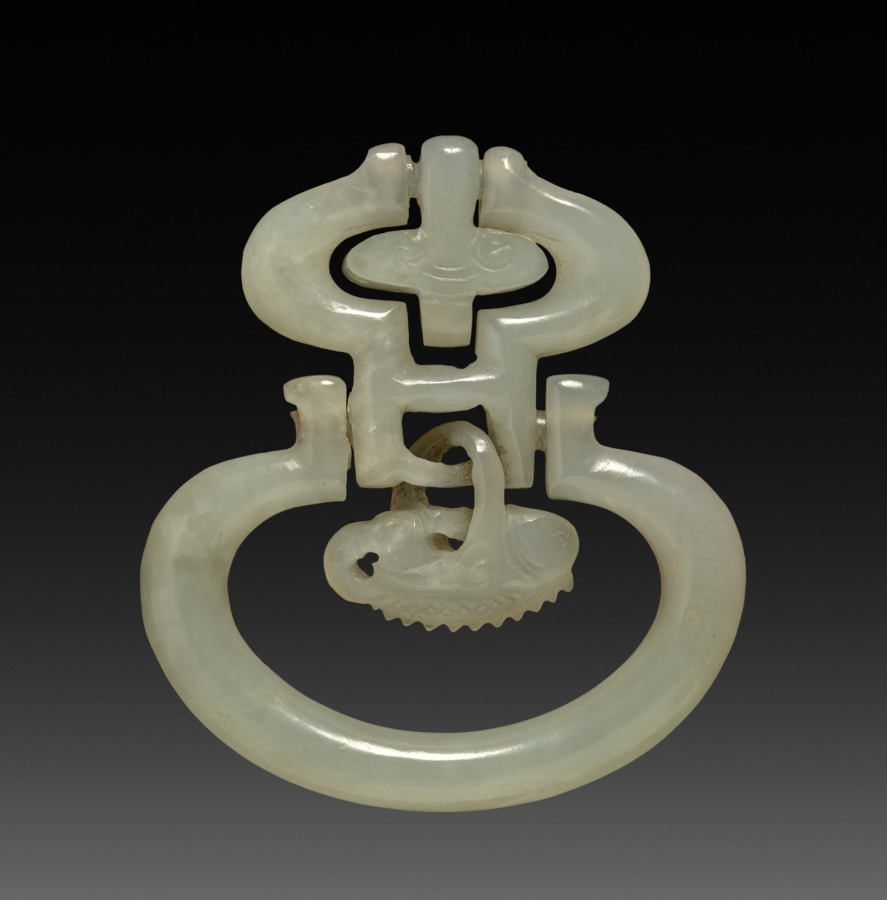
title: Part of a Buckle or Ornament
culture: China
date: 1800s–1900s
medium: white jade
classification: Jewelry